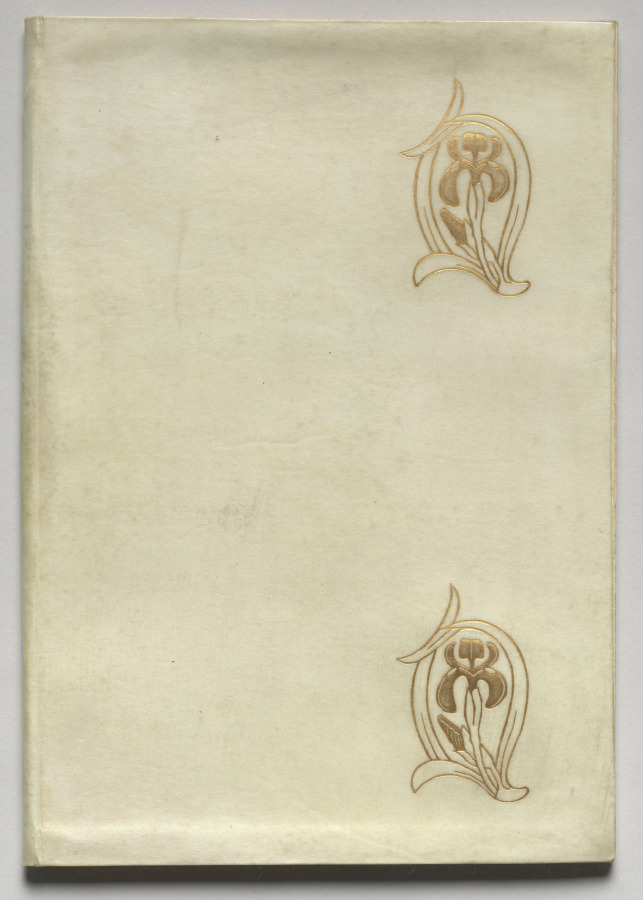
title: The Queen of the Fishes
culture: England, 19th century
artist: Lucien Pissarro (British, 1863–1944)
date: 1894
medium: Bound volume with color wood-engraved illustrations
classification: Bound Volume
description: “The Queen of the Fishes” is a French fairy tale about two mistreated children who turn into a fish and an oak tree. This edition was the first book published by the Eragny Press, the private firm of Lucien Pissarro, son of impressionist painter Camille Pissarro. Following the example of William Morris, Lucien wanted to return to the careful design and high-quality materials of early printed books. He and his wife, Esther Bensusan Pissarro, made this publication almost entirely by hand, including designing and engraving all the illustrations and ornaments.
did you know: Lucian Pissarro was a son of Impressionist painter Camille Pissarro.